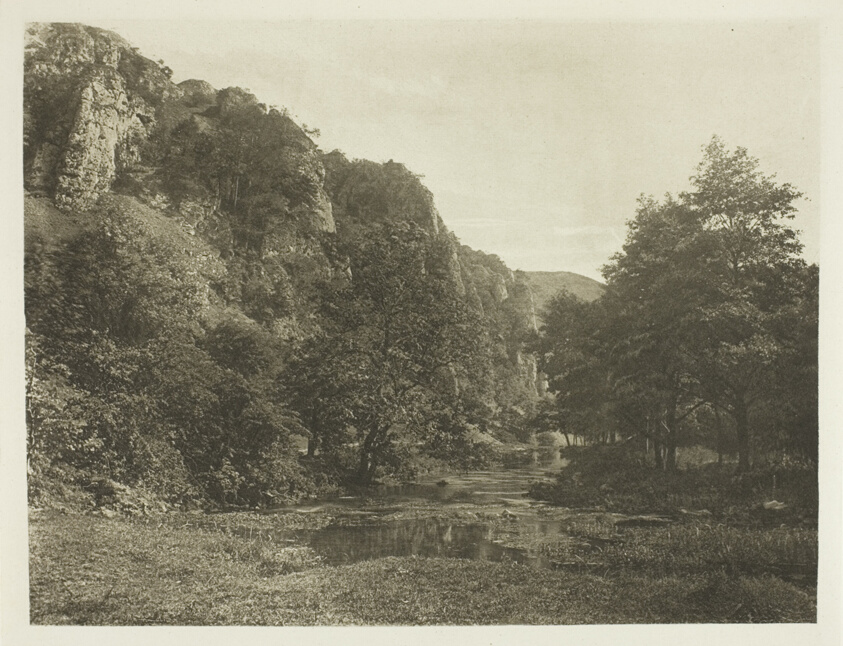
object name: Photograph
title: Tissington Spires, Dove Dale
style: 19th century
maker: Peter Henry Emerson (English, born Cuba, 1856–1936)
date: 1880s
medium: Photogravure, plate XLV from the album "The Compleat Angler or the Contemplative Man's Recreation, Volume II" (1888)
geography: England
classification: photogravure; photomechanical process; photography; photograph